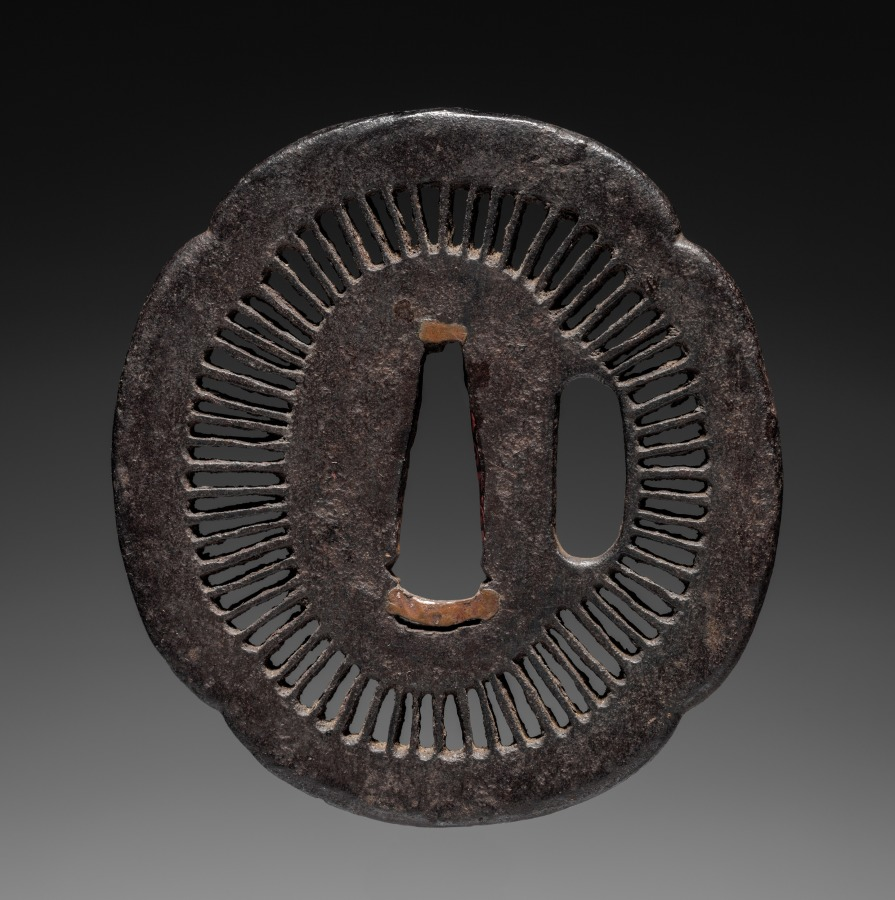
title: Sword Guard (Tsuba)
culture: Japan, possibly Edo period (1615-1868)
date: c. 1615–1868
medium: iron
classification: Arms and Armor